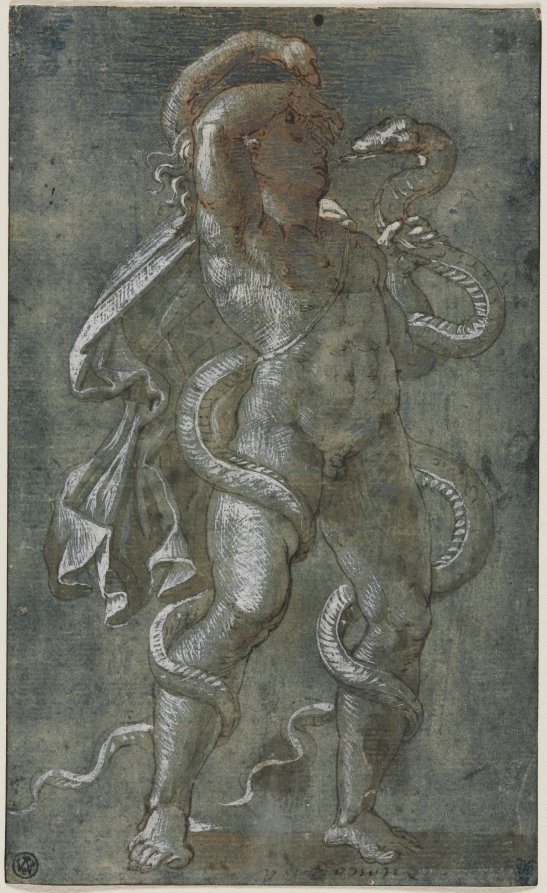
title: Man Entwined by Two Snakes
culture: Italy, 16th century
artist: attributed to Giovanni Antonio da Pordenone (Italian, 1483/84–1539)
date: c. 1527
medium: pen and brown ink and brown and blue wash, heightened with white gouache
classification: Drawing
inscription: lower center, in brown ink: Pordenone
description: According to contemporary accounts, Michelangelo attended the excavation of the Greek sculpture Laocoön and His Sons when it was unearthed near Rome in 1506. Laocoön was a Trojan priest who, along with his two sons, was attacked by sea serpents sent by the goddess Athena. The emotional agony of the sculpture fascinated Michelangelo and artists throughout Italy, inspiring copies and variations. In this drawing, a northern Italian artist referenced just one figure from the story using the chiaroscuro technique—achieved here with dark and light inks on blue toned paper—to emphasize the sculptural quality of the body.